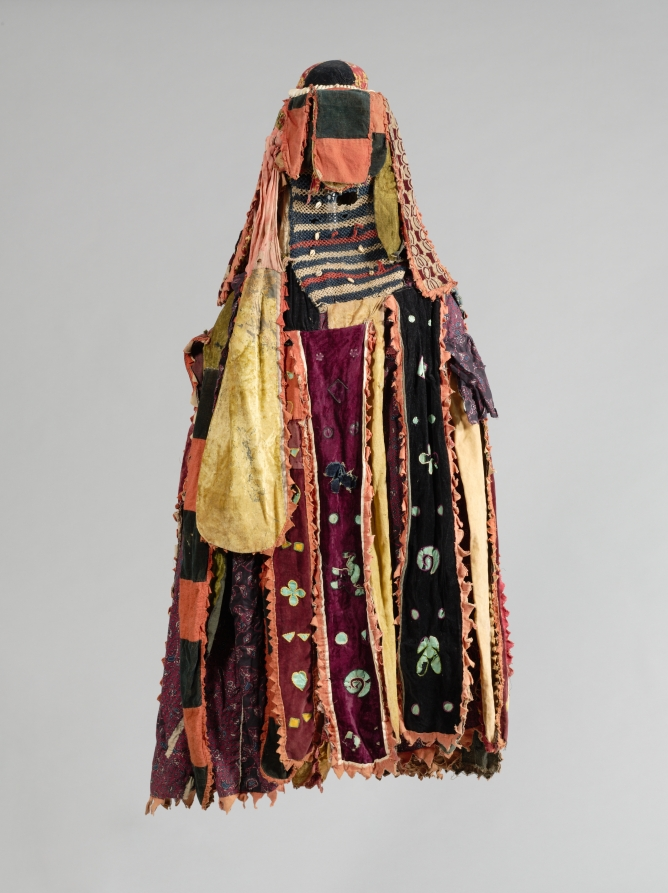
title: Egúngún Masquerade Dance Costume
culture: Africa, West Africa, Nigeria, Yorùbá-style maker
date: 1900s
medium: cotton, velvet, flannel, leather, dye, probably wood, cowrie shells, metal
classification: Mask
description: Swirling into motion, egúngún masquerade costumes appear during annual festivities to bless the community. Manifesting ancestral spirits, they serve as a bridge between the living and the otherworld. The fabric panels create a dwelling place for ancestral spirits. Arranged and selected according to Yorùbá design sense (ojú-ọnà), this mask incorporates hundreds of African, Asian, and European fabrics. These include imported damasks, velvets, faux furs, and embroideries, as well as local indigo-dyed cottons.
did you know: This masquerade costume is made from both imported and locally made fabrics.